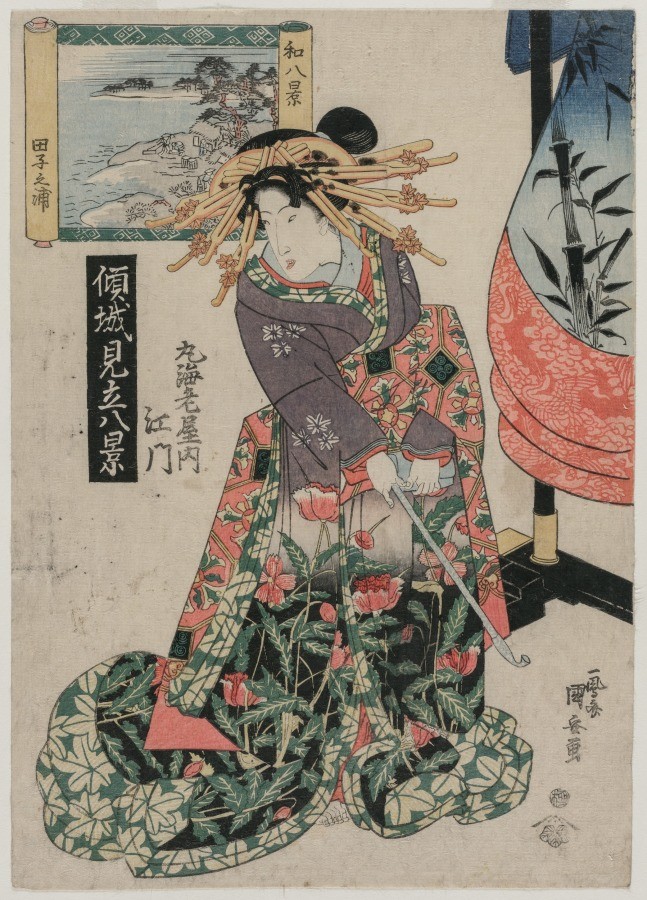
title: The Courtesan Emon of Maruebiya with a View of Tago Bay (form the series Courtesans with a Playful Group of Eight Views)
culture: Japan, Edo period (1615–1868)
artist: Utagawa Kuniyasu (Japanese, 1794–1834)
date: c. late 1820s or early 1830s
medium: color woodblock print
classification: Print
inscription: Signature: Ipposai Kuniyasu ga. Publisher: Tsutaya Jūzaburō (emblem). Censorship Seal: kiwame.